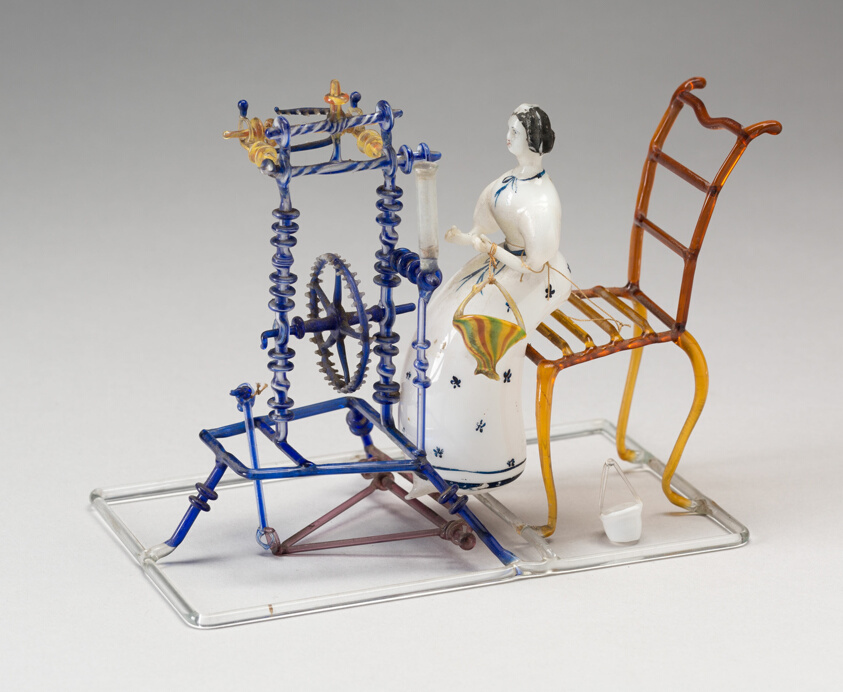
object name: Glass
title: Spinner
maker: Nevers, France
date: 18th century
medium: Glass; lampwork (verre de Nevers), metal armature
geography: France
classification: glass; miniature; decorative object/ornament; european decorative arts